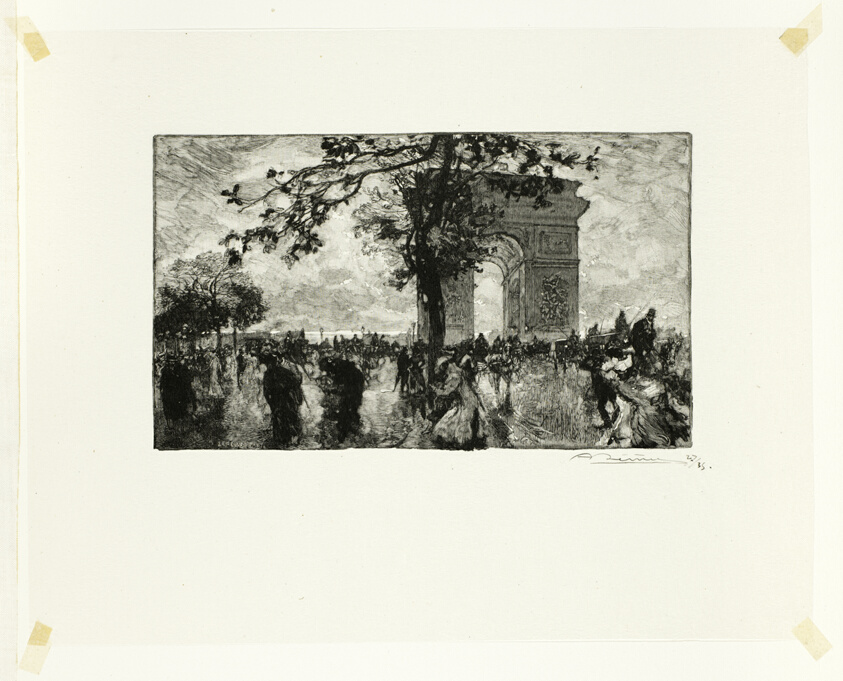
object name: Print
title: Retour du Bois, place de l'Etoile, plate nineteen from Le Long de la Seine et des Boulevards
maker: Louis Auguste Lepère (French, 1849-1918); published by A. Desmoulins (French, active c. 1908-1910)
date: 1890, published 1910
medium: Wood engraving in black on cream Japanese tissue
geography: France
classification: wood engraving; paper; print; prints and drawing